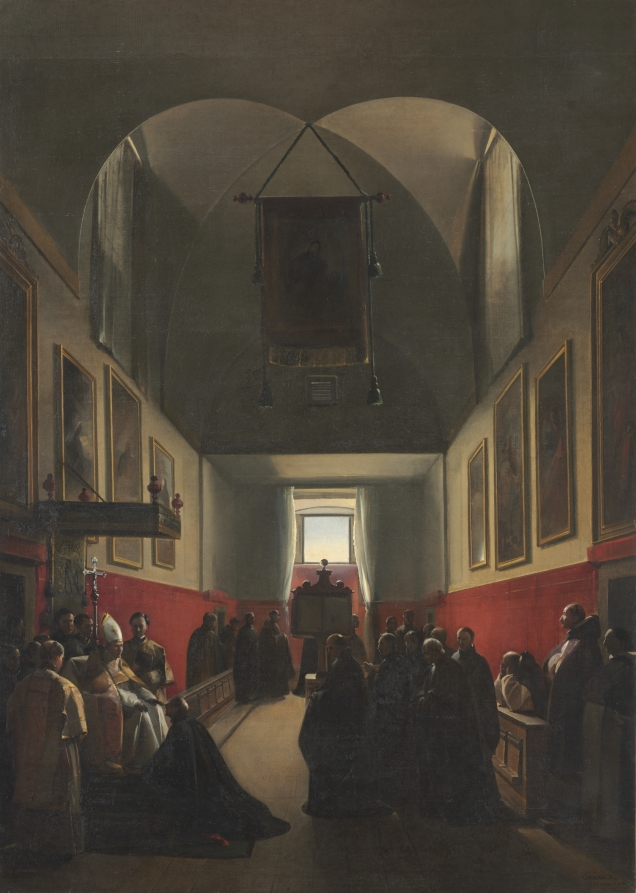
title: Homage to a Bishop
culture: France, 19th century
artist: François Marius Granet (French, 1775–1849)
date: 1839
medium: oil on fabric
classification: Painting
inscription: Signed lower right: granet. / versailles / 1839